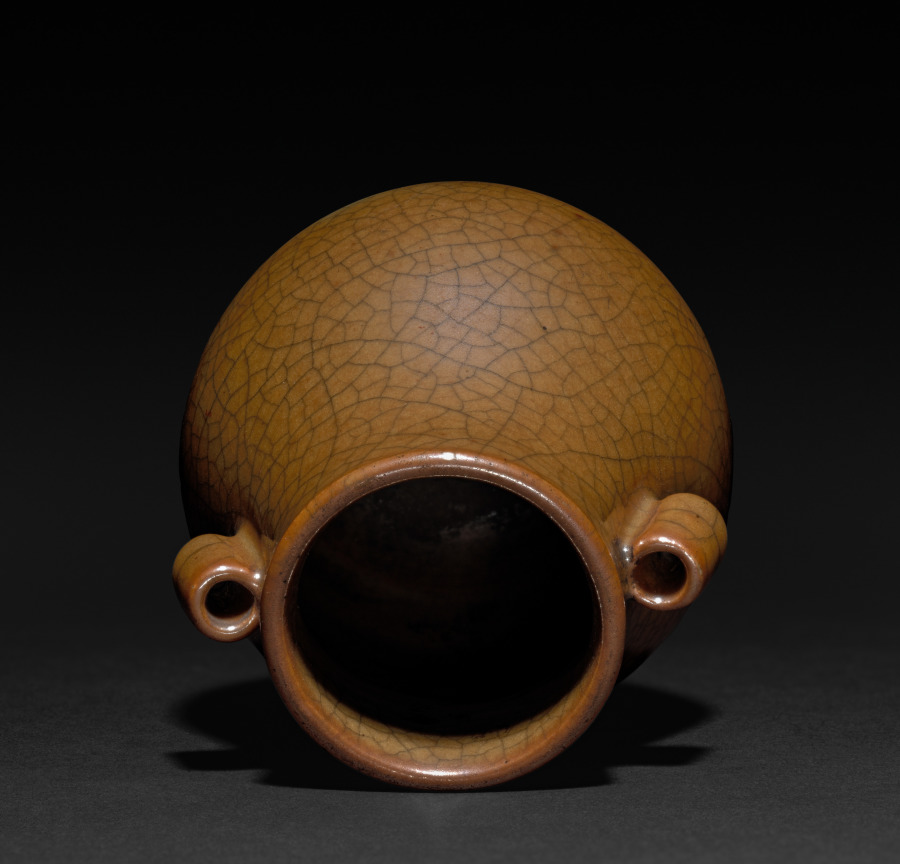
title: Pear-shaped Jar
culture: China, Qing dynasty (1644-1911), Kangxi reign (1661-1722)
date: 1661–1722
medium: porcelain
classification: Ceramic